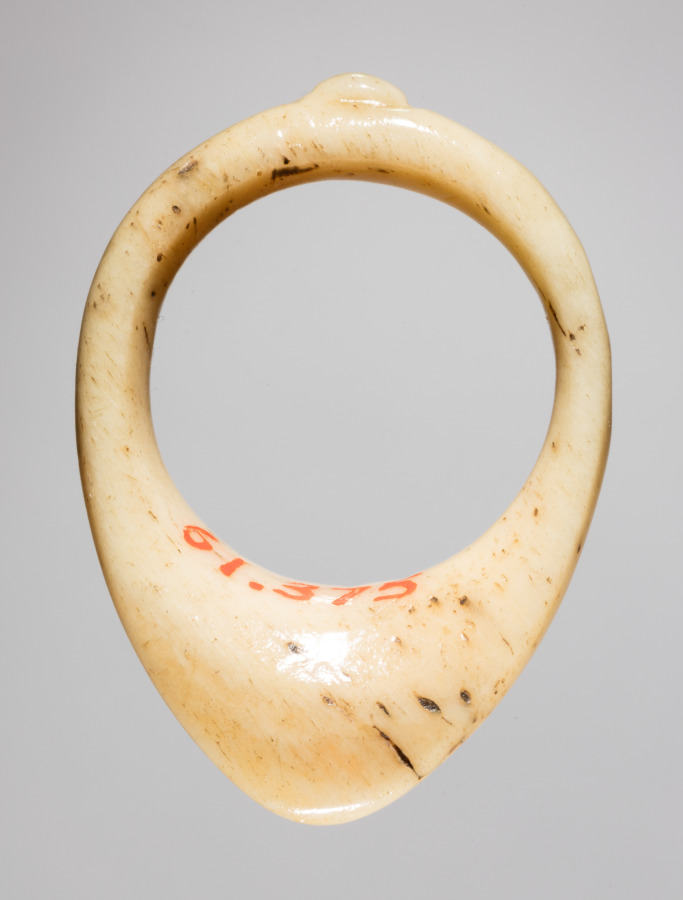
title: Ring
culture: Iran, early Islamic period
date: 700s - 900s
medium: bone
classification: Miscellaneous